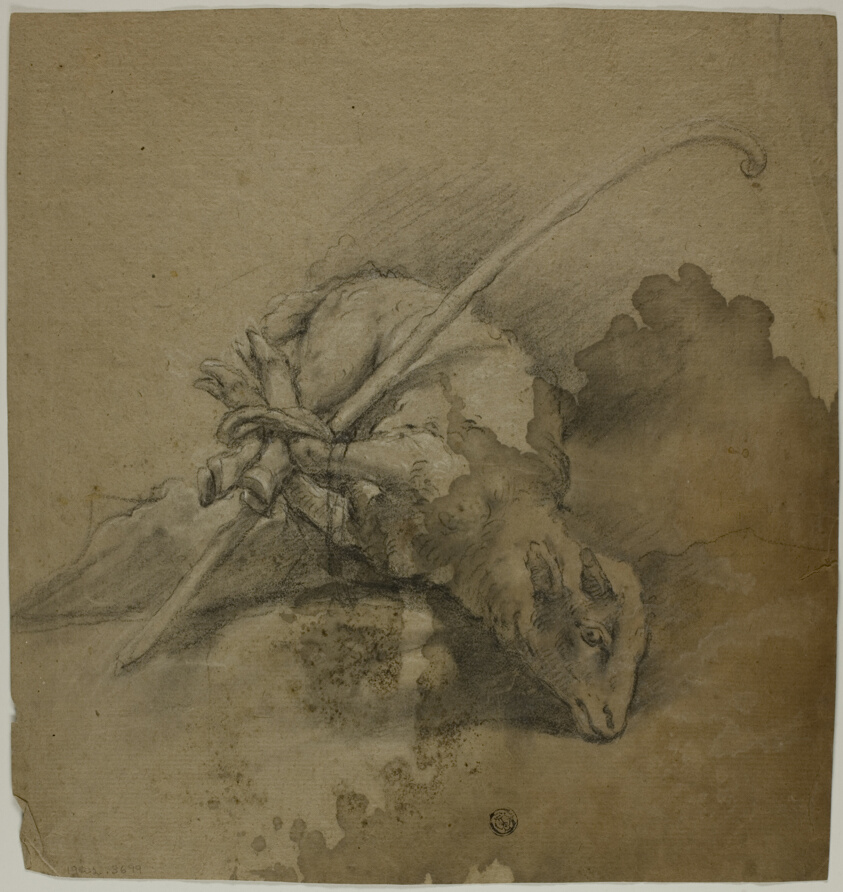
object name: Drawing and Watercolor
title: Lamb Bound to Shephard's Crook (recto); Seated Academic Male Nude, From Back, Turning Right (verso)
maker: School of Giovanni Battista Piazzetta (Italian, 1682-1754)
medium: Black and white chalk (recto), and black chalk (verso), on brown laid paper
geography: Italy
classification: drawings (visual works); prints and drawing